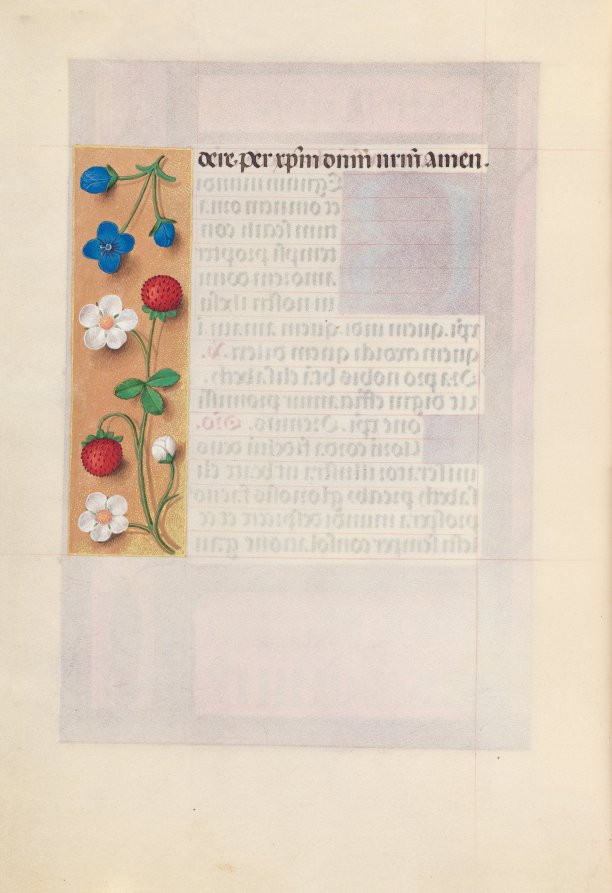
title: Hours of Queen Isabella the Catholic, Queen of Spain: Fol. 198v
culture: Flanders, Ghent and Bruges, late 15th century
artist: Master of the First Prayerbook of Maximillian (Flemish, c. 1444–1519)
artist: and Associates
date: c. 1500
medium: ink, tempera, and gold on vellum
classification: Bound Volume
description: This manuscript was illuminated by a circle of at least five highly organized manuscript painters active in the Flemish cities of Ghent and Bruges. The principal illuminator was Alexander Bening, who painted the majority of the book's miniatures. Manuscripts produced by this circle of artists are renowned for the decoration of their borders, which typically feature a rich variety of realistically-painted flowers, birds, and butterflies. This prayer book, called a book of hours, was intended not for a cleric, but for the private devotions of a lay person-in this case, Isabella the Catholic, Queen of Spain (1451-1504). Isabella's coat of arms embellishes the book's frontispiece. It is unlikely that the book was commissioned by the Queen herself; rather, she probably received it as a diplomatic gift from someone courting her patronage, perhaps Cardinal Francisco Jimenez de Cisneros. A Franciscan friar, Jimenez was dependent upon Isabella for his advancement, first to the post of Queen's confessor in 1492, and then to Archbishop of Toledo in 1495.